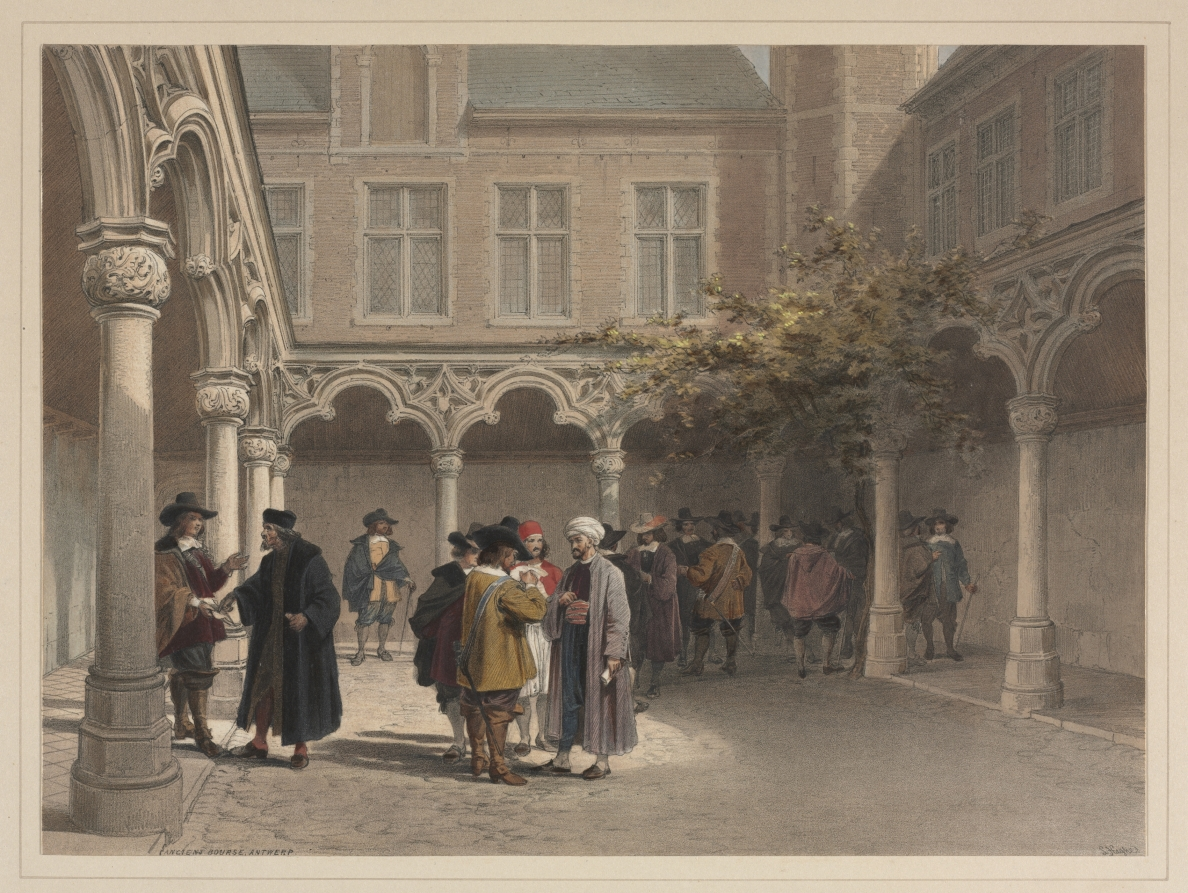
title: Ancien Bourse, Antwerp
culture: England, 19th century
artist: Louis Haghe (British, 1806–1885)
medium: color lithograph with hand coloring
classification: Print